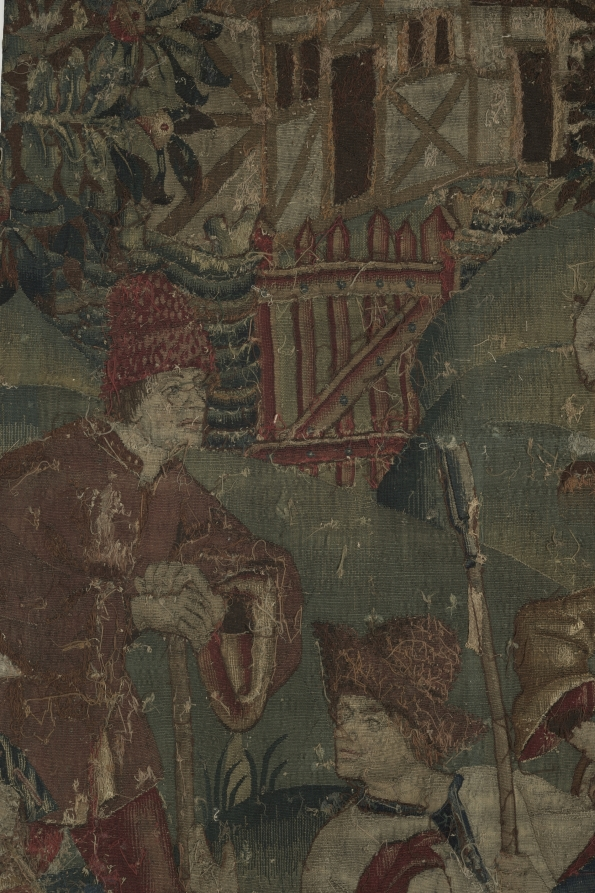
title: Shepherds in a Round Dance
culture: Netherlands, early 16th century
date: around 1500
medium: Wool and silk: tapestry weave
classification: Tapestry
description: Late medieval tapestries often use a limited yet contrasting color palette to portray stylized images. The expressions of these figures, for example, are conveyed more by their postures than by their faces. Four shepherds and shepherdesses join hands and dance to the music of a bagpiper at the far right, while a lord and two ladies on the left look on. A dog and sheep amid blossoming plants and trees contribute to the festive pastoral scene in front of a castle.